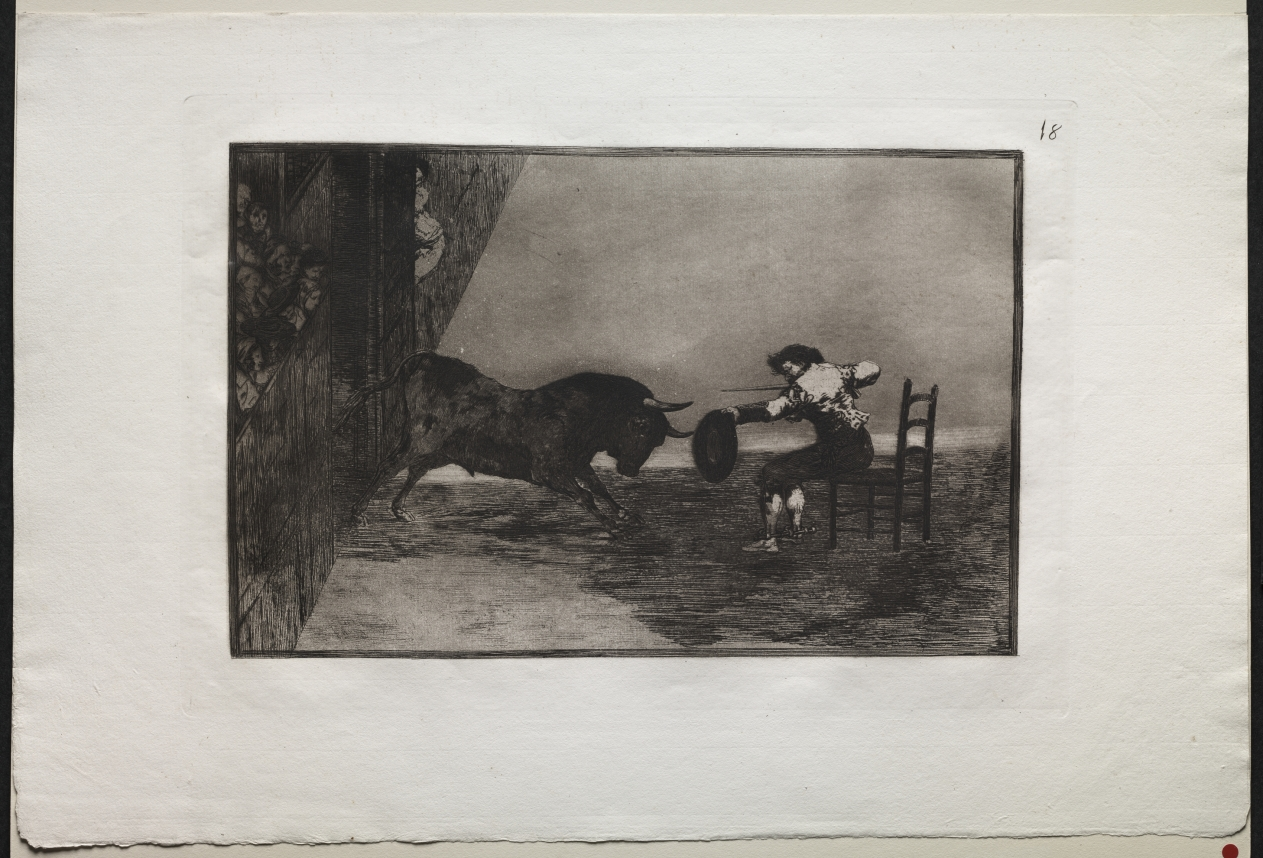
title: Bullfights: The Daring of Martincho in the Ring at Saragossa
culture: Spain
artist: Francisco de Goya (Spanish, 1746–1828)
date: 1816, printed 1876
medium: engraving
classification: Print